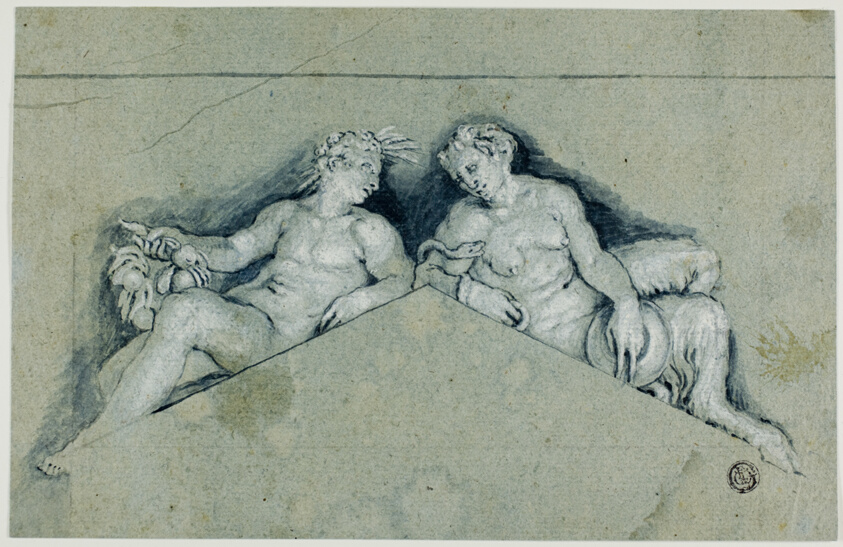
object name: Drawing and Watercolor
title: Overdoor with Allegorical Male Figure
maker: After Paolo Caliari, called Veronese; Italian, 1528-1588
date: 17th century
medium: Brush and blue wash, heightened with lead white, on blue laid paper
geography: Italy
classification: wash; drawings (visual works); prints and drawing